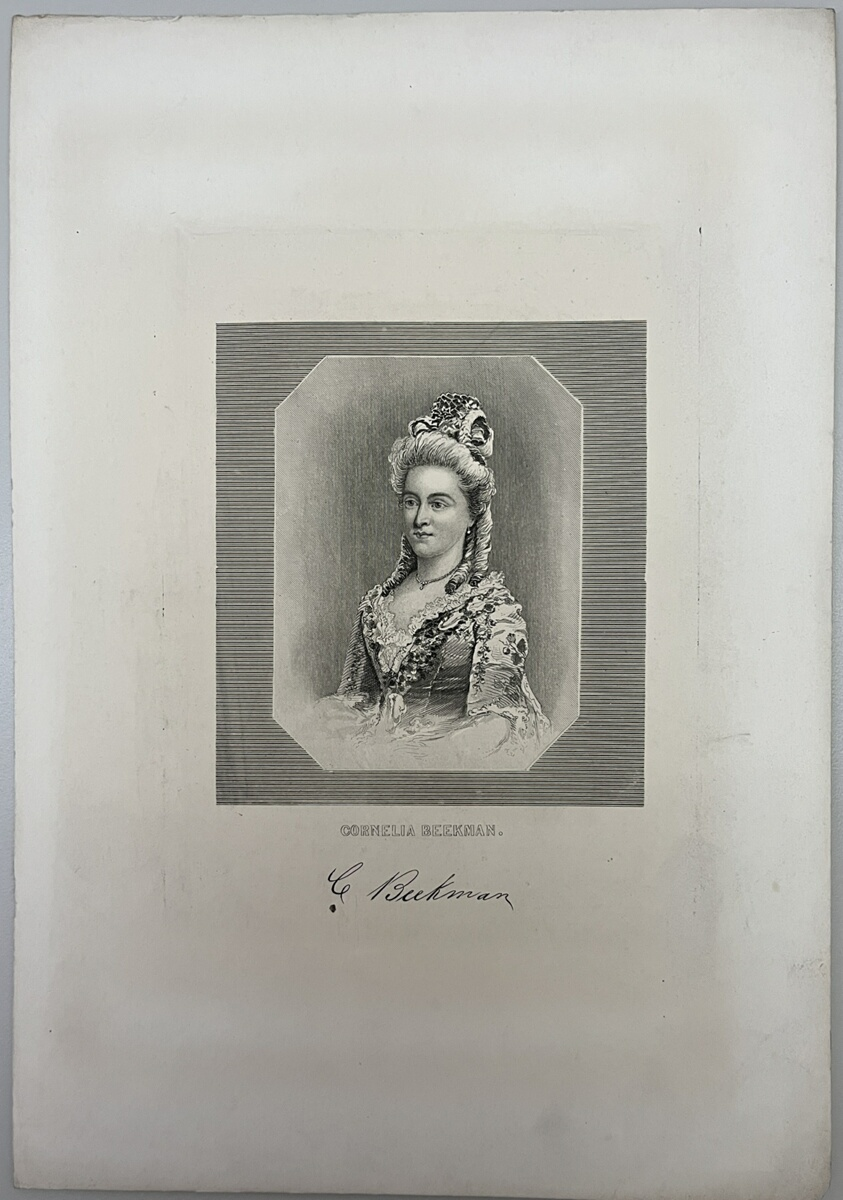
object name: Print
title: Cornelia Beekman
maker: Artist Unknown (Likely American or British, 19th century)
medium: Stipple etching and etching on paper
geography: United States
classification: reproduction; print; prints and drawing